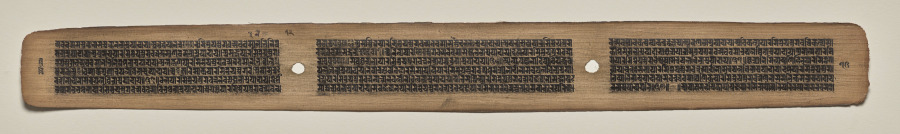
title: Text, Folio 72 (verso), from a Manuscript of the Perfection of Wisdom in Eight Thousand Lines (Ashtasahasrika Prajnaparamita-sutra)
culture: Eastern India, Bihar, Vikramashila Monastery. Painting: Nepal, Kathmandu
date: Sunday, September 14, 1119 (year 239 of the Newar Samvat in the month of Ashvina)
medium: gum tempera and ink on palm leaves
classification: Painting